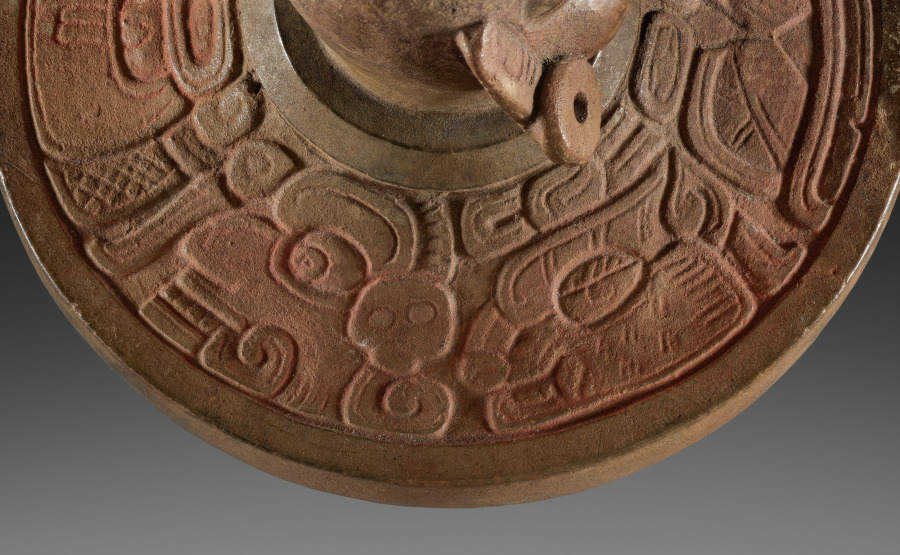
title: Tripod Vessel with Lid (lid)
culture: Mexico or Central America, Maya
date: 250–600 CE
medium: earthenware with pigment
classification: Ceramic